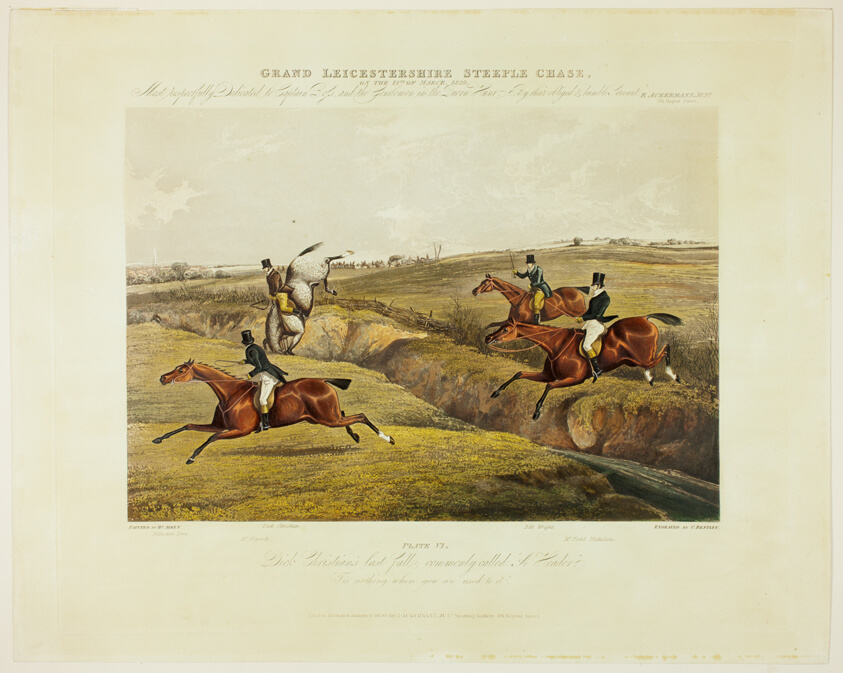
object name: Print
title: Dick Christian's Last Fall, from Grand Leicestershire Steeplechase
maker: Charles Bentley (English, 1806-1854); after Henry Alken (English, 1785-1851); published by R.A. Ackermann (English, 1764-1834)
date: published 1830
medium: Color aquatint on paper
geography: England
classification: aquatint; print; prints and drawing